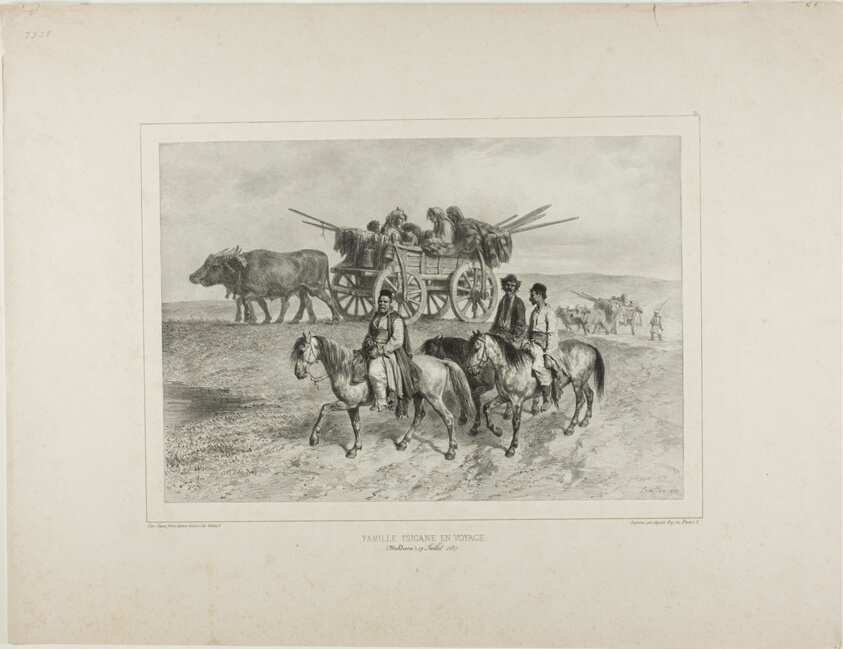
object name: Print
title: Family of Traveling Hungarian Gypsies, Moldavia, July 19, 1837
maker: Denis Auguste Marie Raffet (French, 1804-1860); printed by Auguste Bry (French, 19th century); published by Chez Gihaut Frères (French, 19th century)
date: 1839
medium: Lithograph in black on gray chine laid down on ivory wove paper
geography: France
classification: lithograph; print; prints and drawing